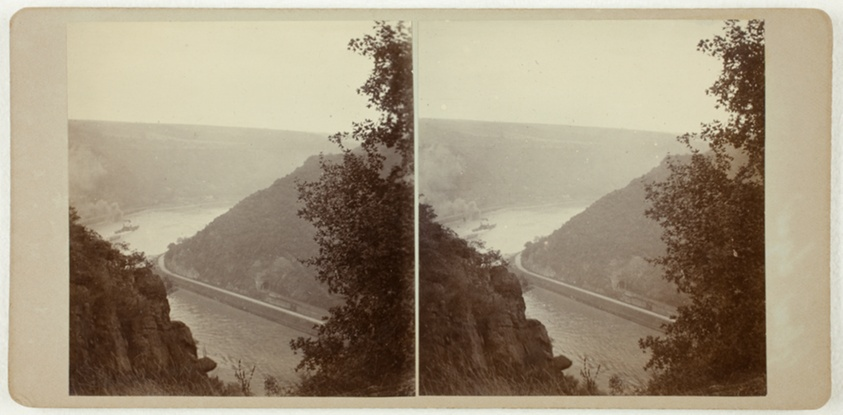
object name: Photograph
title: Untitled (From the Lorelei)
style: 19th century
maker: Artist unknown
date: 1860s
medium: Albumen print, stereo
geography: Rhine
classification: photograph; albumen silver print; photography